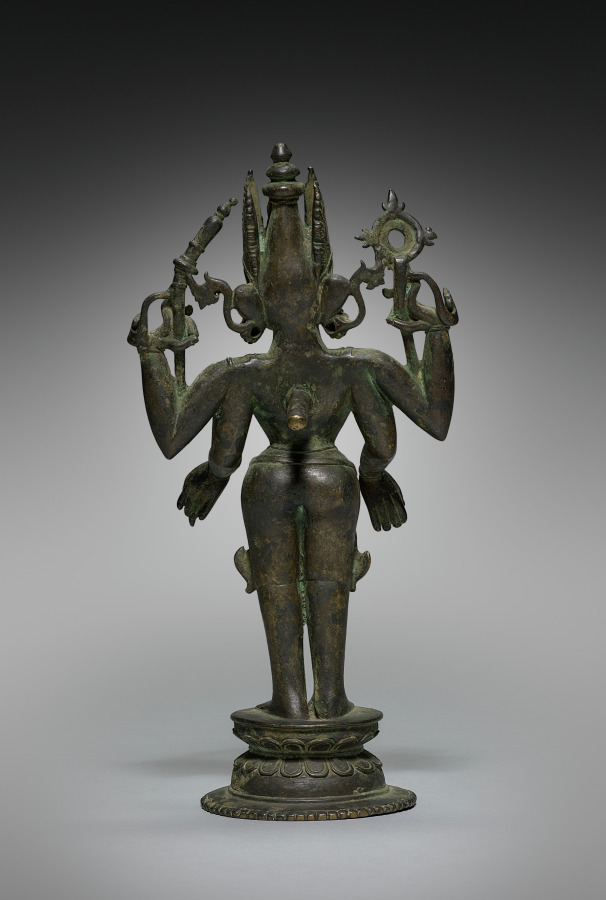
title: Vasudeva - Vishnu - Narayana as Shridhara, one of the 24 forms of Vishnu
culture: West India, 16th-17th century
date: 1500s–1600s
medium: brass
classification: Sculpture